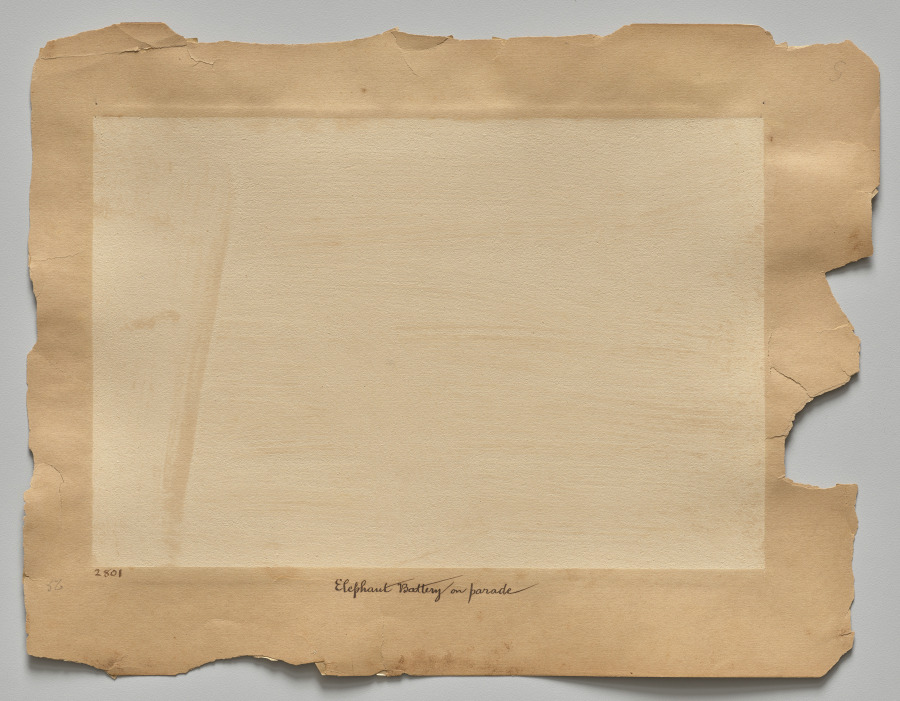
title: Elephant Battery on March at Jhansi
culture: India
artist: Raja Deen Dayal (Indian, 1844–1905)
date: c. 1882–87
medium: albumen print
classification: Photograph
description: These photographs are part of an album, now disassembled, of around 105 photographs taken in India between 1885 and summer 1887 that provide glimpses into the lives of the British colonial elite and royal and upper-class Indians. The museum holds another group of 37 pictures from this album (2016.266), which was probably commissioned by a British civil servant visiting or working in India around 1888 as a personal souvenir of his experiences there.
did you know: Raja Deen Dayal is regarded now, and was considered during his lifetime, to be India’s most important 19th-century photographer.